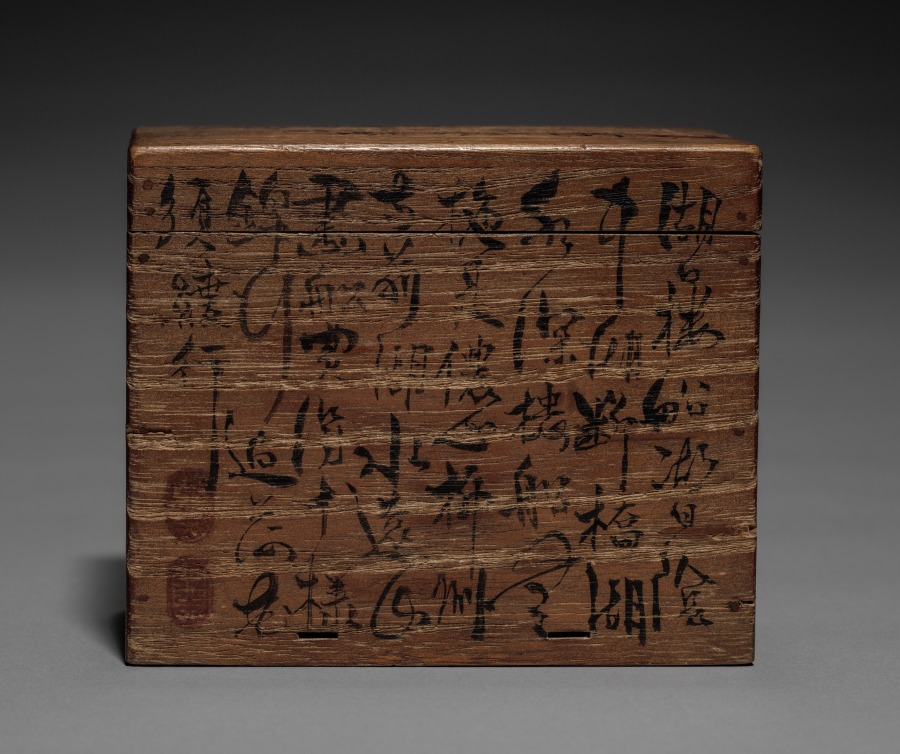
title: Pair of Tea Containers with Plum Blossoms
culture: Japan, Edo period (1615–1868)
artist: Aoki Mokubei (Japanese, 1767–1833)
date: early 1800s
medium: porcelain with underglaze blue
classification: Ceramic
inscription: signed "Ro Mokubei" on base in underglaze blue.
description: Aoki Mokubei, born into a family of restaurateurs, was a potter, calligrapher, painter, and scholar, and is considered one of the three masters of later Edo period Kyoto ceramics. He specialized in porcelains fashioned after Chinese prototypes, and created works for steeped tea (sencha) such as these matching tea caddies decorated in an underglaze blue called sometsuke—literally “with applied dye.” He signed them on their bottoms. They also have intricately patterned silk sleeves to both beautify and protect them. On the exterior of the lid of the outer wooden box that contains them, it is written that Mokubei inscribed and painted an image on the box. On the interior of the lid, the signature and seals of a former owner are written. Mokubei has signed the lid of the inner box, and a charming ink and light color composition of West Lake in Hangzhou in China covers its three sides. On the fourth side is a long inscription by Mokubei describing the scene.